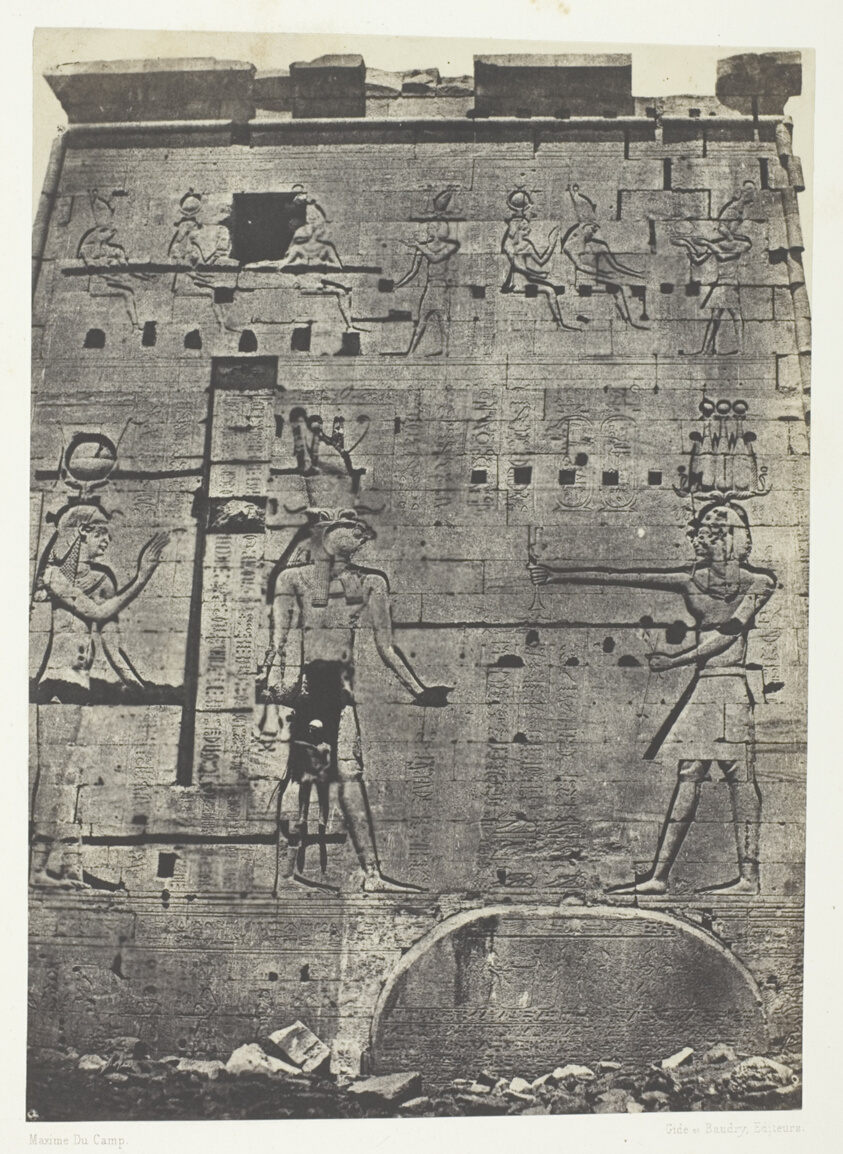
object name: Photograph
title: Grand Temple d'Isis à Philoe, Second Pylône; Nubie, plate 74 from the album "Egypte, Nubie, Palestine et Syrie" (1852)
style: 19th century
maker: Maxime Du Camp (French, 1822–1894)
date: 1849/51, printed 1852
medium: Salted paper print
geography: France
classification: salted paper print; photographic process; photography; photograph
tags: Collected by Hugh Edwards, Egypte, Nubie, Palestine et Syrie